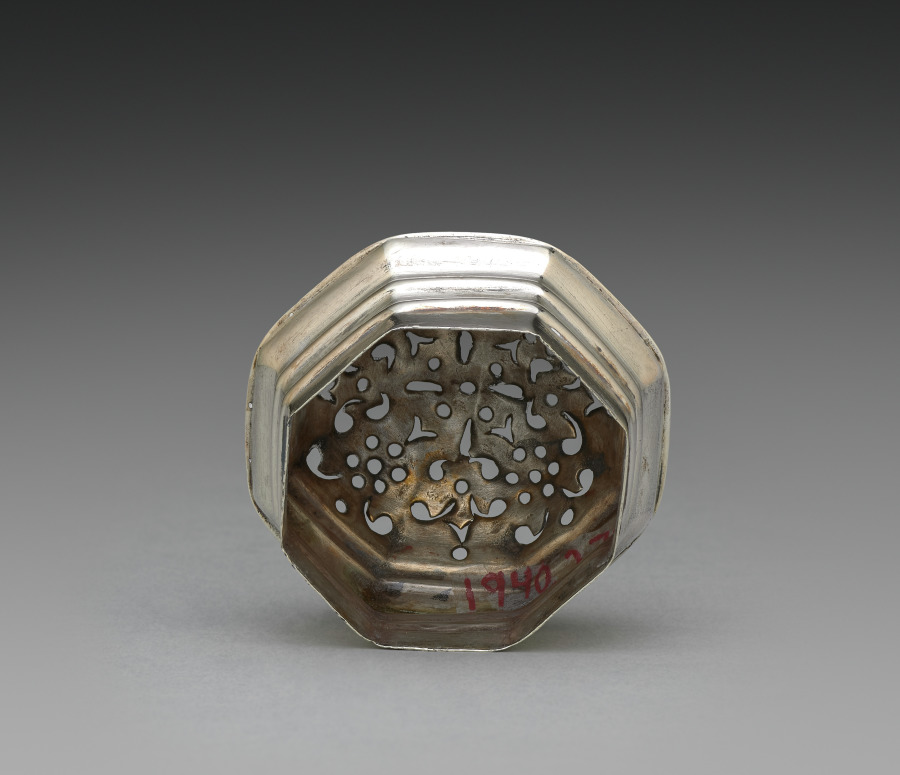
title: Caster (lid)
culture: America, Massachusetts, Boston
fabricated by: Andrew Tyler (American, 1692–1741)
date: c. 1720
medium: silver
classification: Silver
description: A caster was used to spread a finely ground substance, probably pepper.